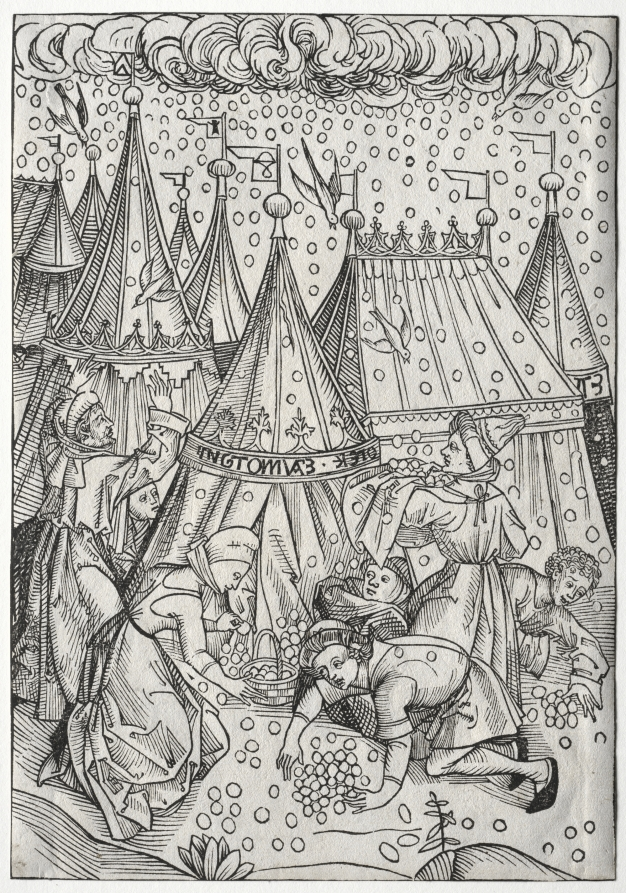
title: Der Schatzbehalter: Gathering of Manna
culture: Germany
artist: Michael Wolgemut (German, 1434–1519)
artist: Wilhelm Pleydenwurff (German, 1450–1494)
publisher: Anton Koberger (German, 1435-1513)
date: 1491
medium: woodcut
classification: Print